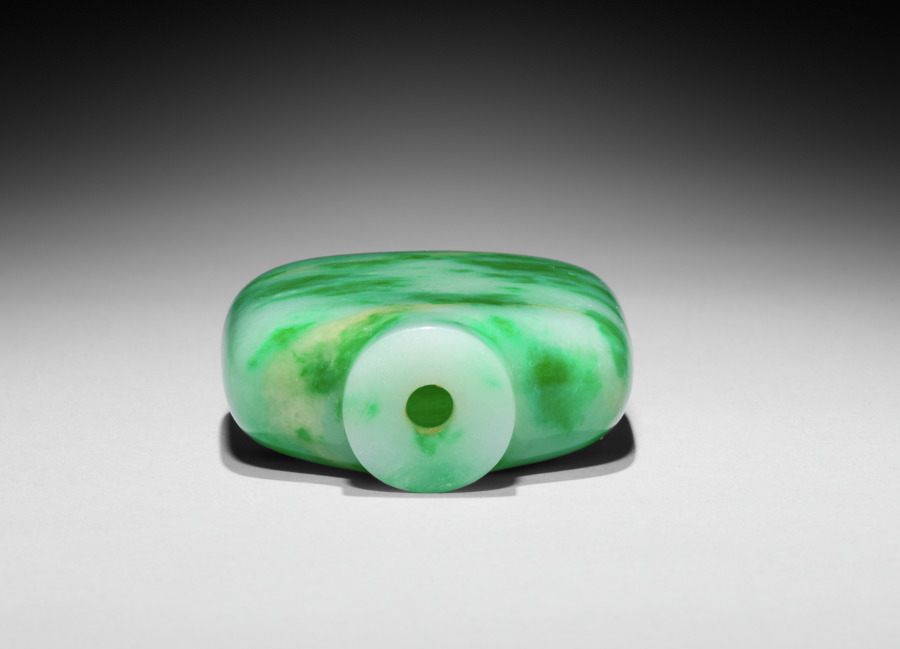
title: Snuff Bottle with Stopper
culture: China, Qing dynasty (1644-1911)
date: 1800s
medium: jade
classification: Jade